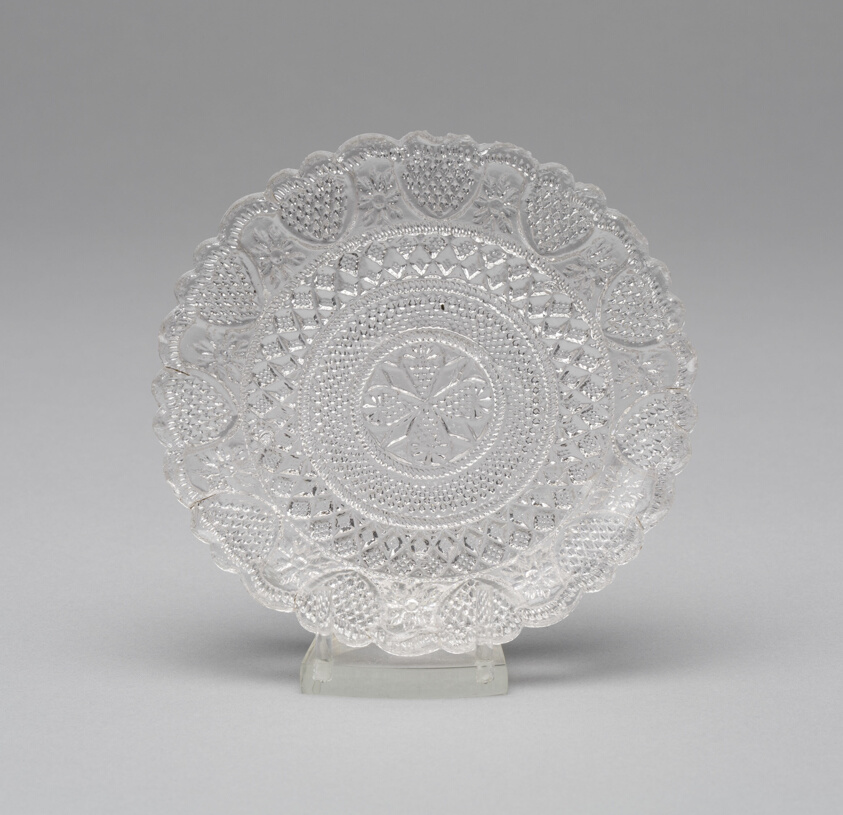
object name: Glass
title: Cup plate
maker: Artist unknown (American, 19th century)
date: c. 1830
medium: Pressed glass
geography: United States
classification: plate (general, dish); glass; american decorative arts; american arts; decorative arts